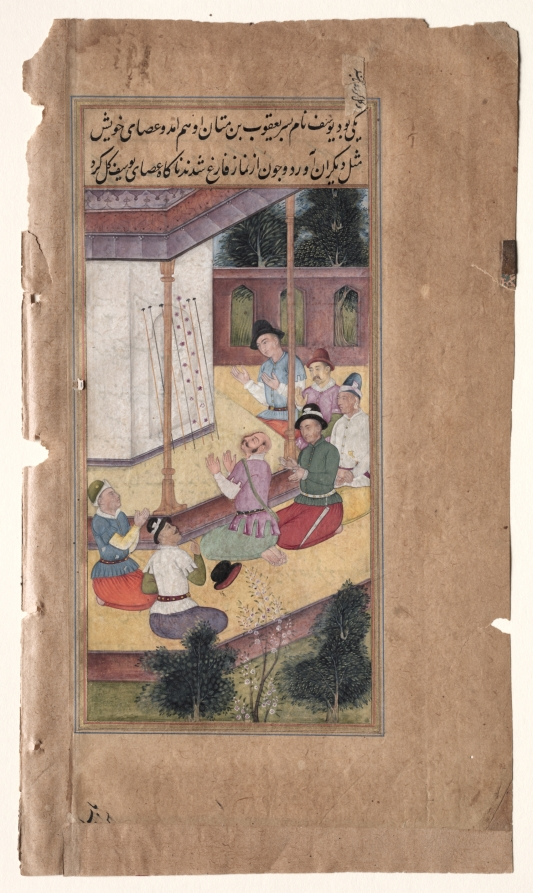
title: The Flowering of Joseph’s Rod (folio 11 verso), from a Mirror of Holiness (Mir’at al-quds) of Father Jerome Xavier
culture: Mughal India, Allahabad, made for Prince Salim (1569–1627)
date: 1602–04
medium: Gum tempera, ink, and gold on paper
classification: Manuscript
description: Joseph kneels outside the temple, among, according to the text, a group of unmarried men. The artist has depicted them dressed like contemporary Portuguese merchants wearing button-down belted shirts. The men had been ordered by God to bring their staffs to the temple; the one whose staff blossoms would become the husband of Mary. Joseph quivers with astonishment as his staff blooms; his hat falls to the ground as though it suddenly came off his head in surprise. Father Jerome’s source for this episode was the apocryphal Gospel of Pseudo-Matthew.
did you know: The suitors in this scene are dressed as contemporary Portuguese men, but have followed the Muslim practice of removing their shoes while in the temple.